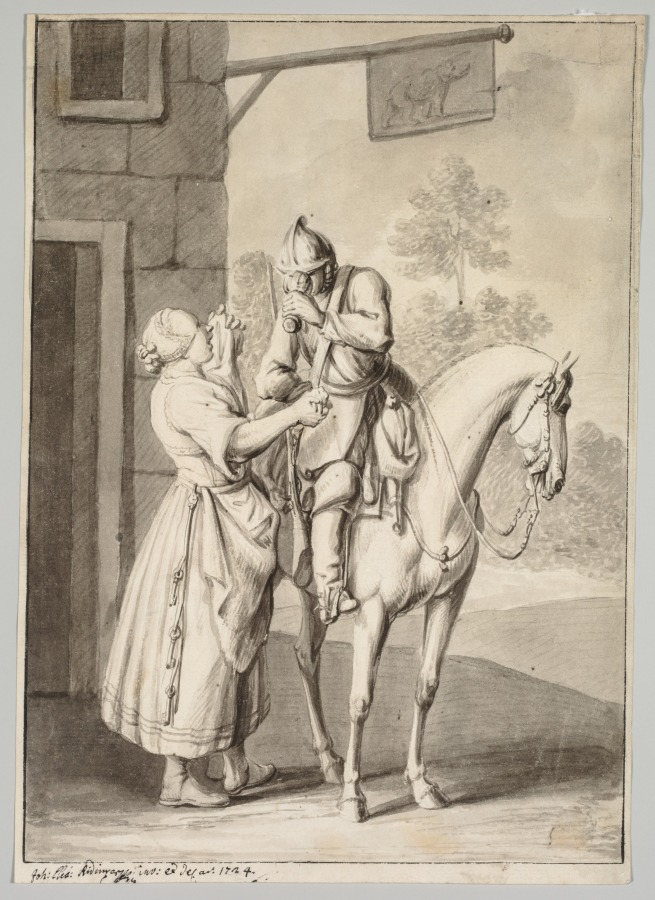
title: A Soldier in Armor in Front of a Tavern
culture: Germany, 18th century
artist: Johann Elias Ridinger (German, 1698–1767)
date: 1724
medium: Gray wash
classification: Drawing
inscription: Inscribed, lower left, beneath border, in black pen and ink: Joh: Elia: Ridinger inv: et del.an. 1724